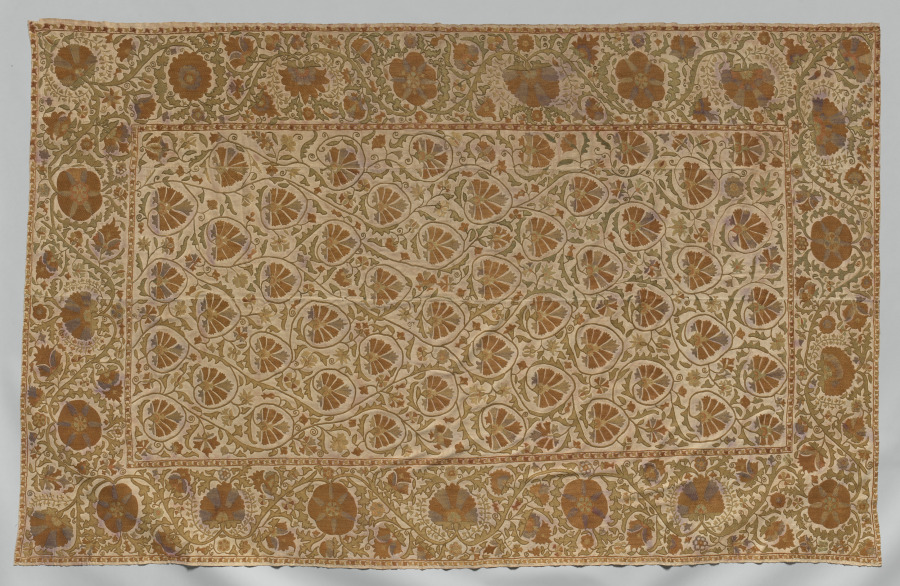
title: Embroidered Cover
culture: Uzbekistan, Bukhara, 19th century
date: 19th century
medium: embroidery: silk on cotton tabby ground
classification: Embroidery